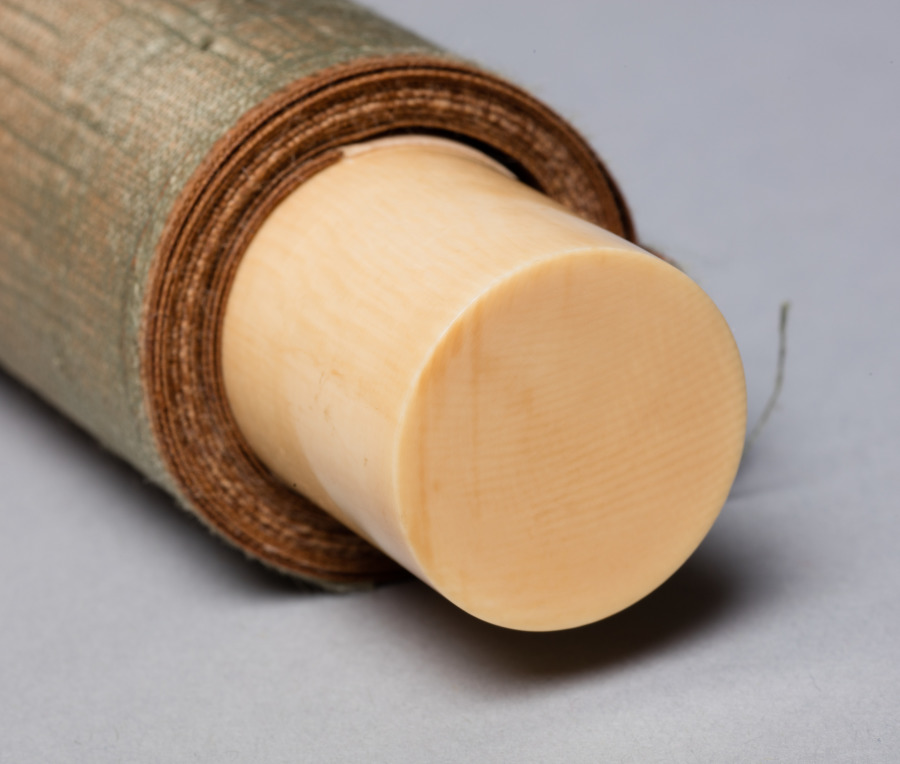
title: Pan Lang (Han Rō)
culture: Japan, Muromachi period (1392–1573)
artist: Shikibu Terutada (Japanese, active mid-1500s)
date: mid-1500s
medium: Fan-shaped painting mounted as hanging scroll; ink and gold on paper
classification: Painting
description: These three fan-shaped paintings, now mounted as individual hanging scrolls, were once part of a set of 20 mounted on a folding screen. They portray the Chinese subjects, from left to right, of the scholar-official Pan Lang, Hanshan reciting his poetry to Shide, and a duck in flight above reeds. Pan Lang grew so fond of the mountain in his place of exile that when he was ordered back to the capital, he rode backward on his donkey so he could see it until it receded into the distance. Hanshan and Shide worked in the kitchen of a Zen monastery, but were actually reincarnations of the bodhisattvas Manjushri and Samantabhadra. The combination of a mandarin duck and reeds may have signified a level of attainment in Chinese civil service exams. All three paintings bear the seal of the Kantobased artist Shikibu Terutada. Shikibu was familiar with Kano school painting, but he also modeled his early style after that of the prominent Kanto-based Kenkō Shōkei (active about 1470–after 1523).